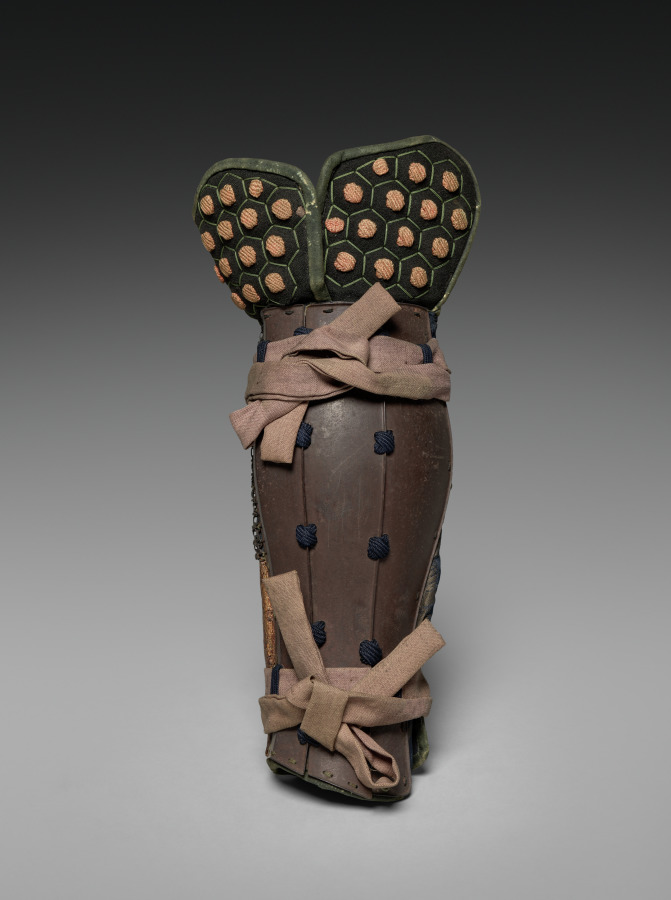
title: Shin Guard (Sune-ate)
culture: Japan, Edo period (1615–1868)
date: 1600s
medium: Iron, lacquer, textile (silk)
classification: Arms and Armor